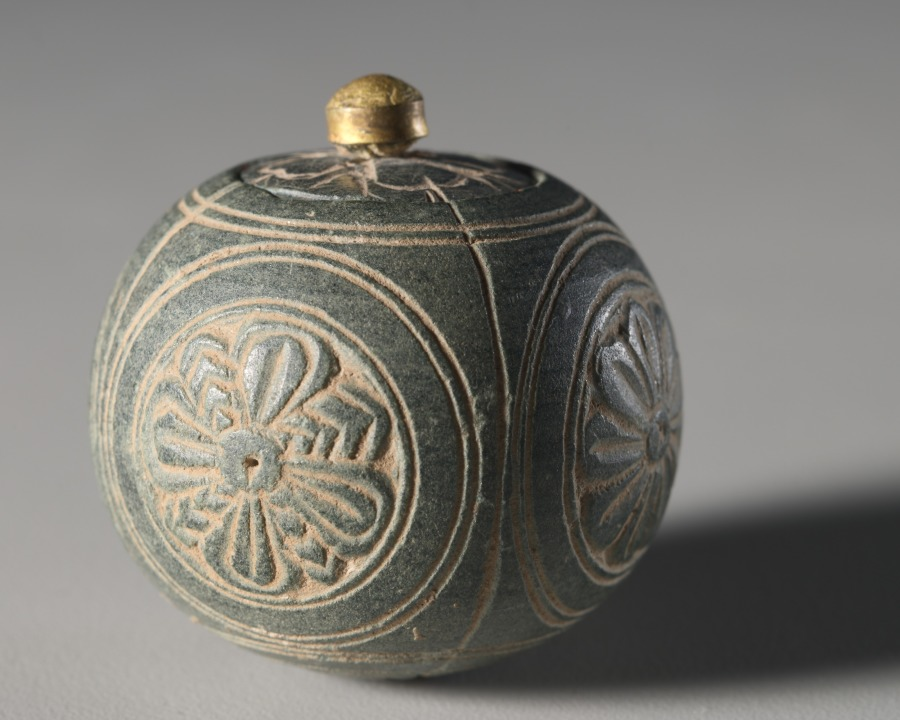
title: Miniature Stone Reliquary or Toilette Casket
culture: Pakistan, Gandhara, probably Sirkap, early Kushan period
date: 1–100 CE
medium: gray schist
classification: Sculpture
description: Tiny reliquaries holding the cremated remains of the Buddha or a high-ranking holy person empowered monuments and made them sacred. A Buddhist monument, such as the solid hemispherical mounds called stupas, would not be worshipped until it was consecrated with the relic secreted inside. Bits of ash were combined with tiny gems inside a crystal or glass reliquary, which was then placed inside a stone or metal container, like the lidded versions seen here. These containers look like cosmetic vessels for aromatic pastes used for perfume in ancient India. Buddhist texts state that the enlightened Buddha emitted a fragrance like sandalwood paste; the form of the reliquary as a perfume bottle indicates the presence of the Buddha by the visual reference to his pleasant scent. Once enclosed in the stupa the reliquaries would not be seen, but monks were tasked with applying sandalwood paste to the exterior of stupas as part of their regular maintenance to convey to visitors the ongoing presence of the Buddha radiating from the relic in the center.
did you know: The knob of the lid is gilded, as is the interior of the casket.